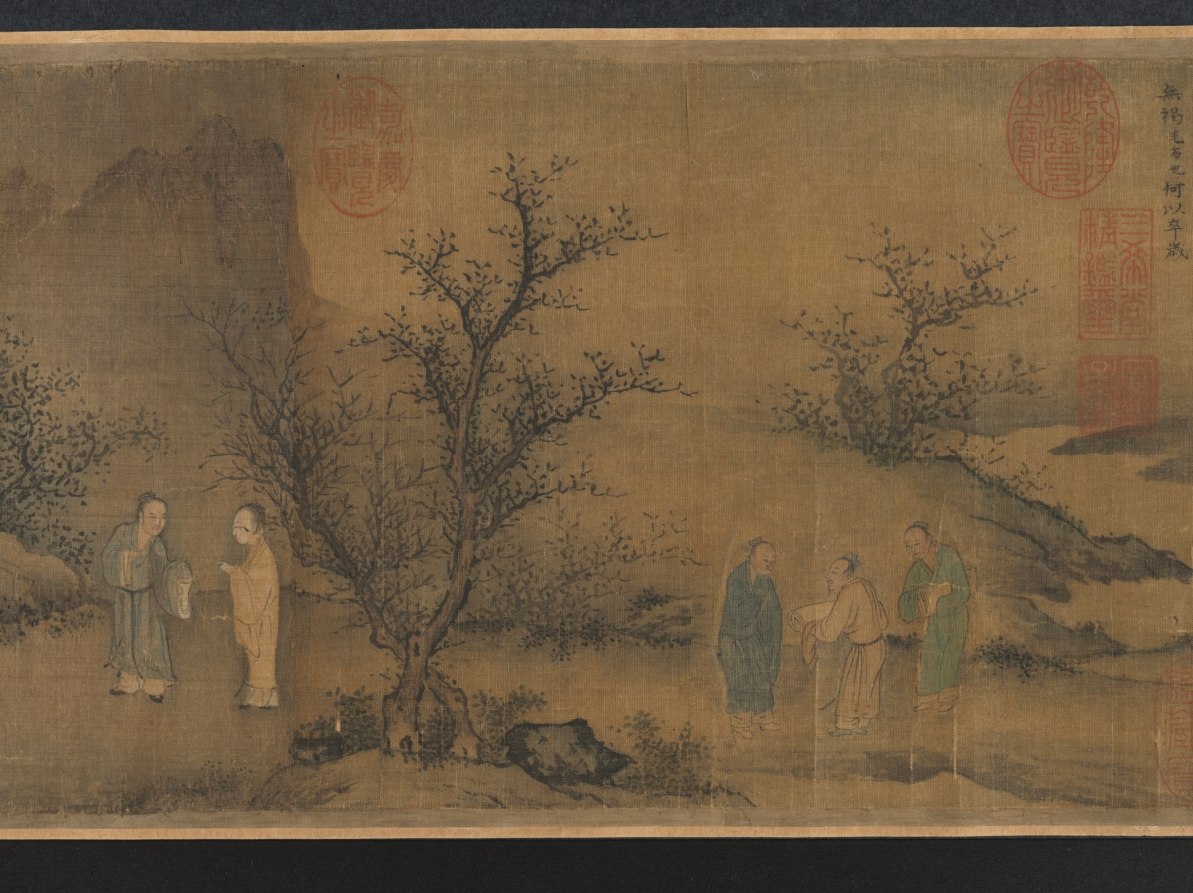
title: "Seventh Month" from the Odes of Bin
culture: China, Southern Song dynasty (1127-1279)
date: 1200s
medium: Handscroll; ink and color on silk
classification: Painting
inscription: Colophons: 1. [on the frontispiece] by the Qianlong emperor (dated 1741). 2. by Lu Wan (dated Zhengde dingchou, 1517). 2. by the Jiaqing emperor (dated 1807).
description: According to Confucian thought, the ruler looks after the well-being of his people which involves agricultural activities. Seventh Month from the ancient Odes of Bin in the Shijing (Book of Poetry) describes occupations throughout the year, including plowing, harvesting, hunting, making clothes, and observing rituals. The earliest illustrations of these Odes accompanied by text were commissioned by Southern Song emperor Gaozong (reigned 1127–1162). As the lower Yangzi delta had become the new seat of government, Gaozong had sets of these illustrations produced by court artists to revive the dynasty and convince the Confucian officialelite of his legitimacy to rule.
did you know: The Odes of Bin appears in the classic Shijing (Book of Poetry), an anthology of more than 300 poems, folk songs, and ceremonial hymns that were originally chanted to music.